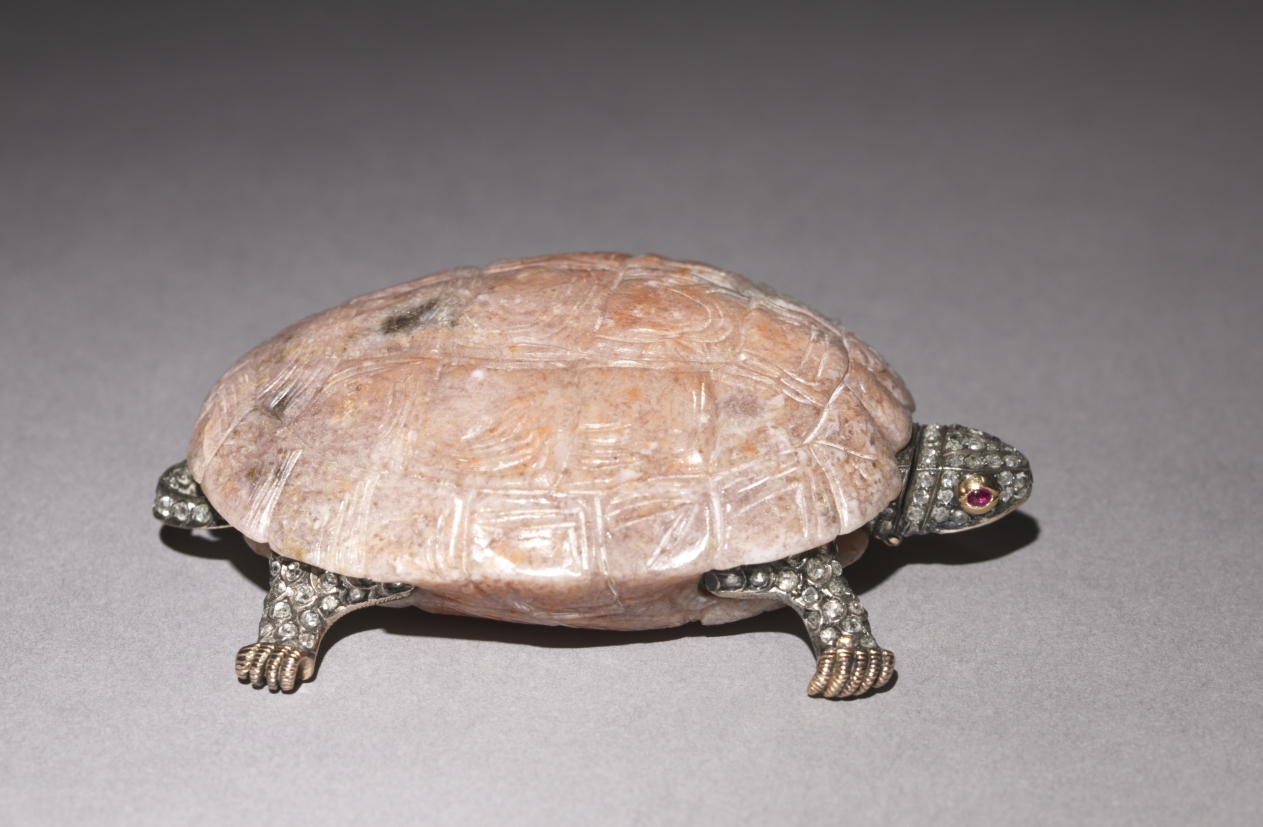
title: Turtle Bell Push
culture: Russia, St. Petersburg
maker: House of Fabergé (Russian, 1842–1918)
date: c. 1895–1915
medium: agate, gold, silver, diamonds, rubies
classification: Miscellaneous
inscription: 7434 scratched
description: In creating luxurious accessories for a desk or tabletop, Fabergé often used native hardstones such as multicolored agate and jasper, green nephrite, pink rhodonite, and rock crystal found in the Ural Mountains of western Russia. By paying careful attention to the unique colors and textures of the stones, Fabergé and his craftsmen brought them to life, turning milky agate into this turtle bell push or black jasper into sleeping puppies. The use of native materials also promoted Russian nationalism, which appealed greatly to the tsar and his family.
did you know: To summon the butler, a quick push on the turtle's head would ring the bell downstairs.